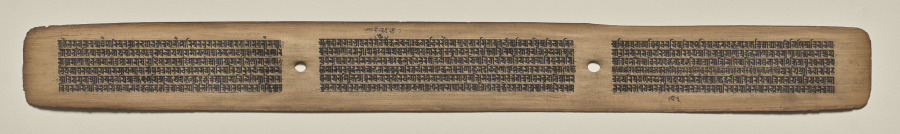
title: Text, Folio 78 (recto), from a Manuscript of the Perfection of Wisdom in Eight Thousand Lines (Ashtasahasrika Prajnaparamita-sutra)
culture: Eastern India, Bihar, Vikramashila Monastery. Painting: Nepal, Kathmandu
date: Sunday, September 14, 1119 (year 239 of the Newar Samvat in the month of Ashvina)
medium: gum tempera and ink on palm leaves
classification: Painting